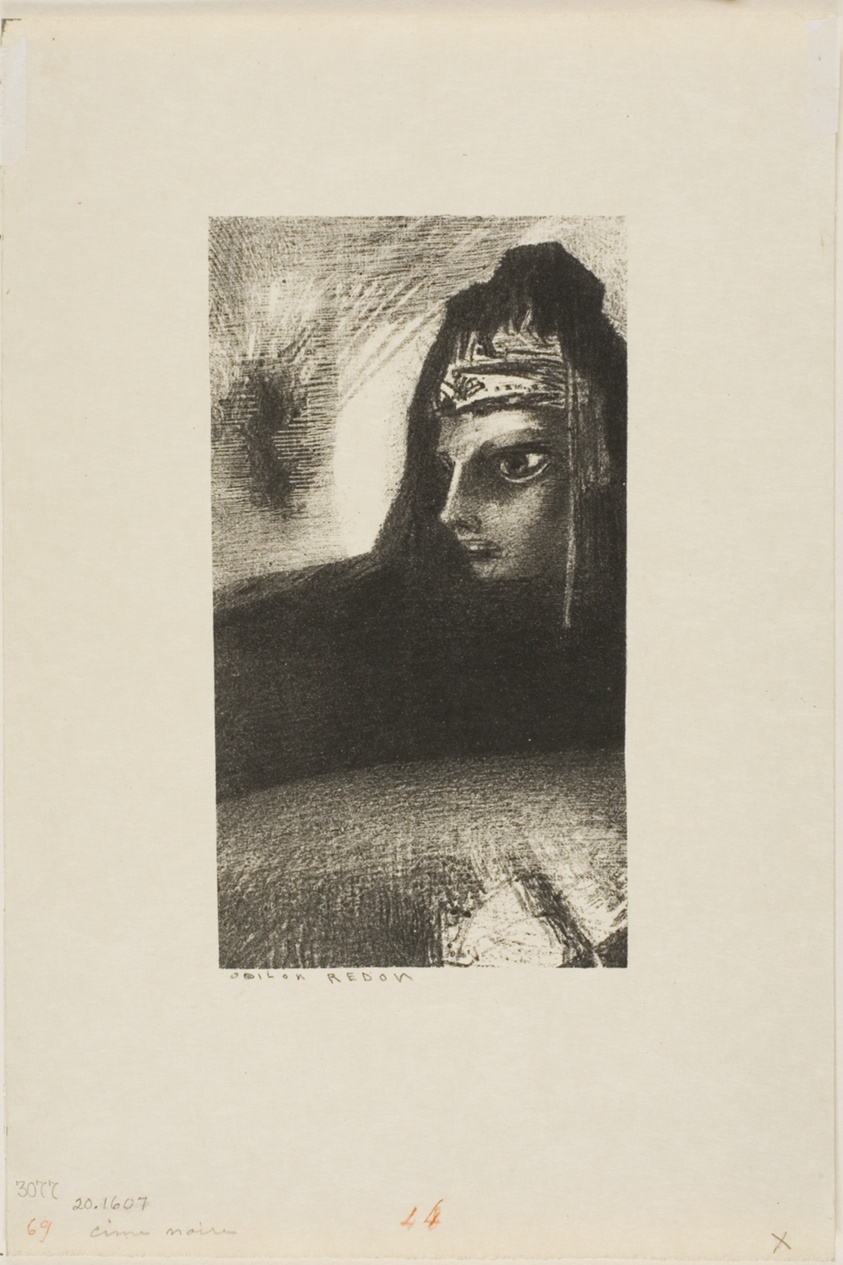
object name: Print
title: Dark Peak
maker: Odilon Redon (French, 1840-1916)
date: 1887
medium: Lithograph in black on ivory Japanese paper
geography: France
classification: lithograph; print; prints and drawing; paper